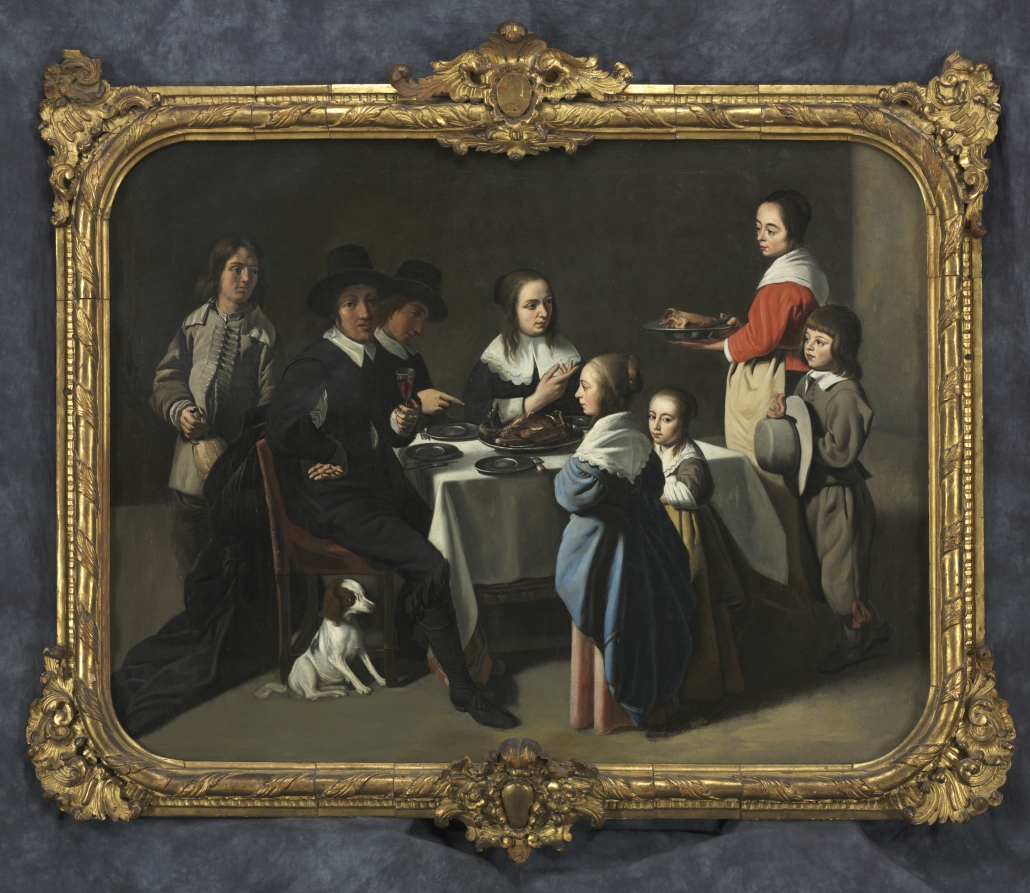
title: A Family Meal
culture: France, 17th century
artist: Le Nain family (French)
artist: after Le Maître des Jeux (French)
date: c. 1645–55 or later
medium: oil on canvas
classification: Painting